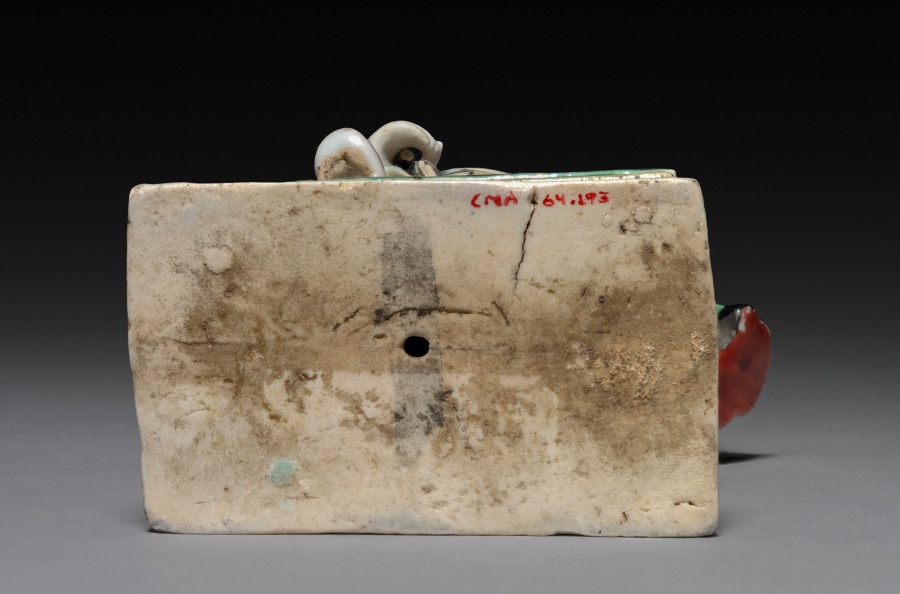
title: Daoist Immortal Zhongli Quan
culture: China, Jiangxi province, Jingdezhen kilns, Qing dynasty (1644-1911), Kangxi reign (1662-1722)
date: 1662–1722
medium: porcelain with famille verte overglaze enamel decoration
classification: Ceramic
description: This porcelain figure represents Zhongli Quan as a scholar. He is wearing a scholar’s hat and carries a scroll on his back. He holds a fan that, according to legend, could bring the dead to life. Thus, he also bears the auspicious meaning of longevity. On his bare belly, the potter painted a qilin, a mythical auspicious creature that turns his head to the sun. The same design in different colors also decorates his back.